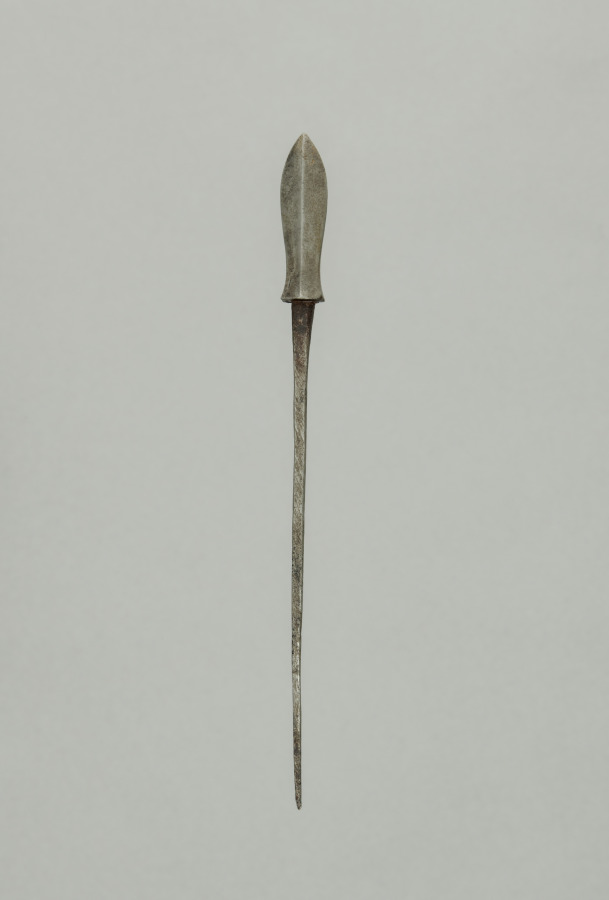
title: Arrow Point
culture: Japan, Edo period (1615–1868)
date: 1700s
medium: steel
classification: Arms and Armor